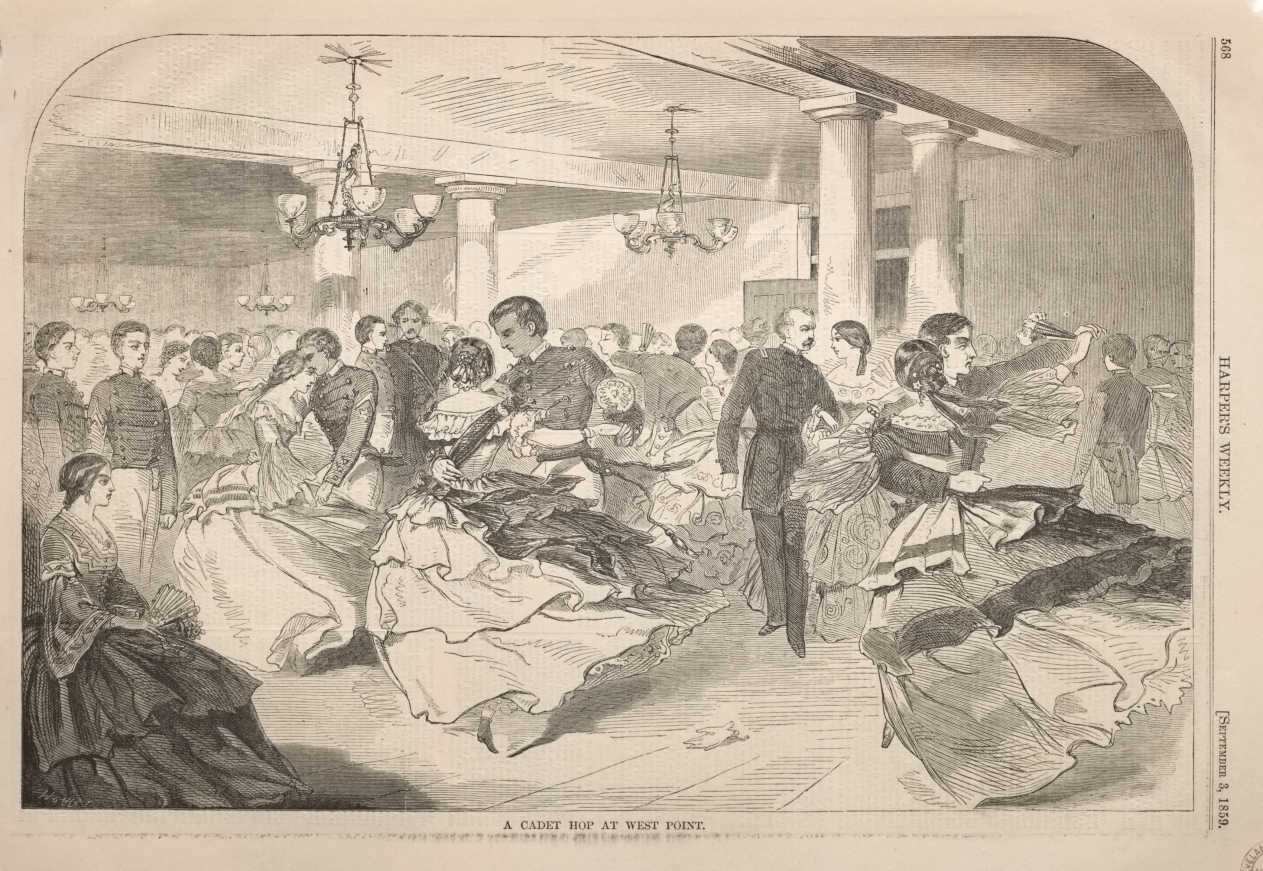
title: A Cadet Hop at West Point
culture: America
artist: Winslow Homer (American, 1836–1910)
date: 1859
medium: wood engraving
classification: Print